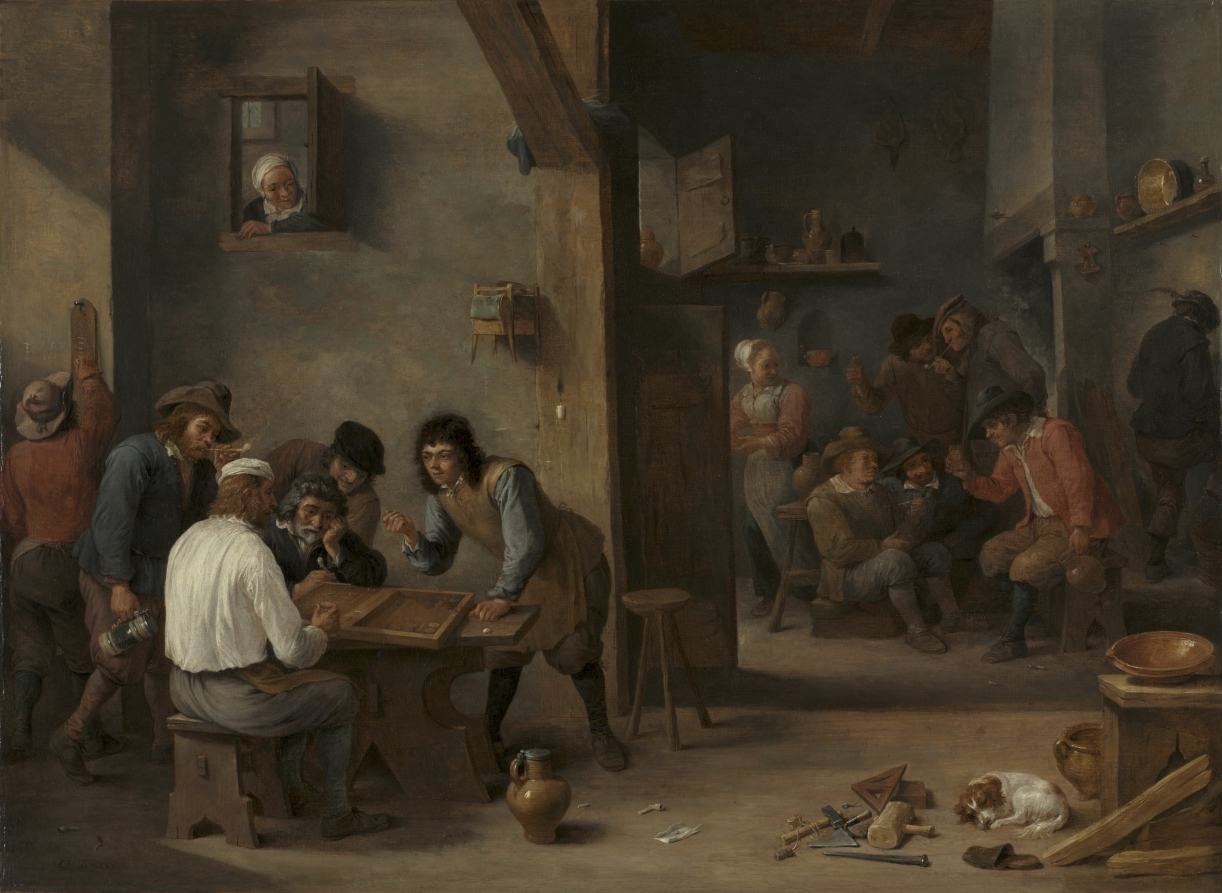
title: Game of Backgammon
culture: Flanders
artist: David Teniers (Flemish, 1610–1690)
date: 1640s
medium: oil on wood, transferred to canvas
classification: Painting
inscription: Signed lower left: "D. TENIERS"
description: The game of backgammon has a long and popular history which can be traced back many centuries. The version of the game as it is played in modern times first appeared in the 1400s under various names. Its current appellation was coined around the same time as the date of this painting. Backgammon was exceptionally popular in the 1600s, and was often played for money or other wagers. The two men on the left side of this painting are clearly involved in a high stakes game of backgammon. A three-man cluster has gathered to watch them lay their bets, while another tallies their points on a scoreboard. The young lady in the right corner of the room otherwise surrounded by men and the older women who looks down on the game of backgammon from a window, both indicate that the interior presented in this painting is probably the gaming room of a brothel. Courtesans often worked out of such game rooms, providing further entertainment for men. Depictions of games, like procurement scenes, often symbolized moralizing virtues. Games were considered at best folly and at worst immoral. Backgammon was often used to represent the foolishness or wickedness of betting and wasting one's time.